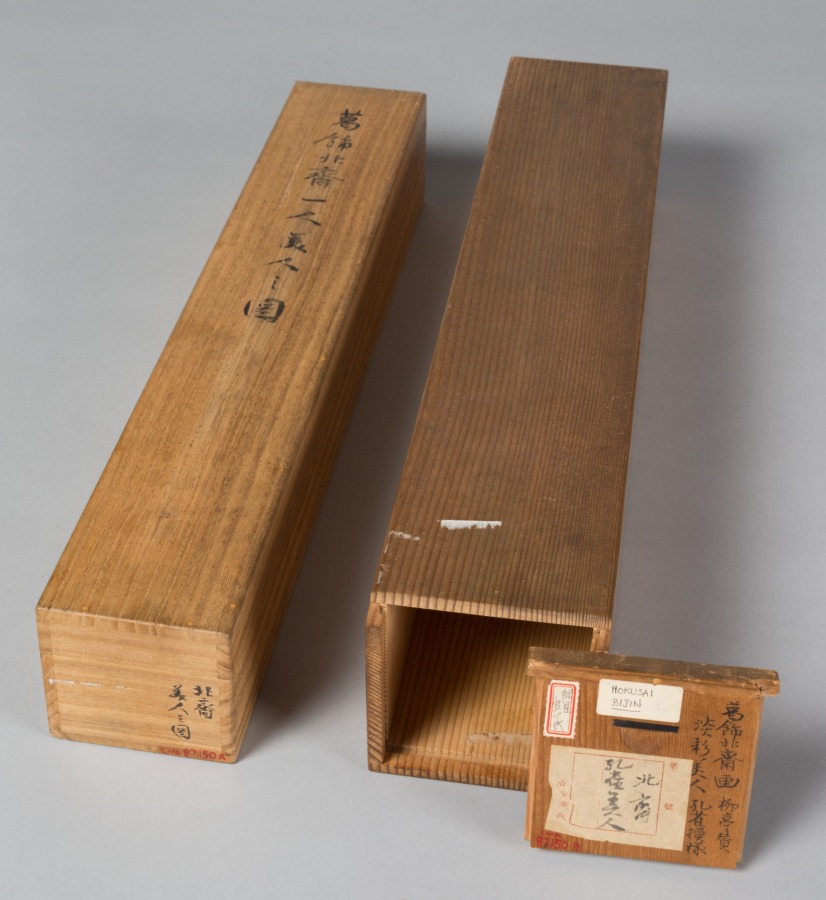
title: Beauty (Bijin)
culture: Japan, Edo period (1615–1868)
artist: Katsushika Hokusai (Japanese, 1760–1849)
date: c. 1775–1849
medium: hanging scroll; ink and color on paper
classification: Painting